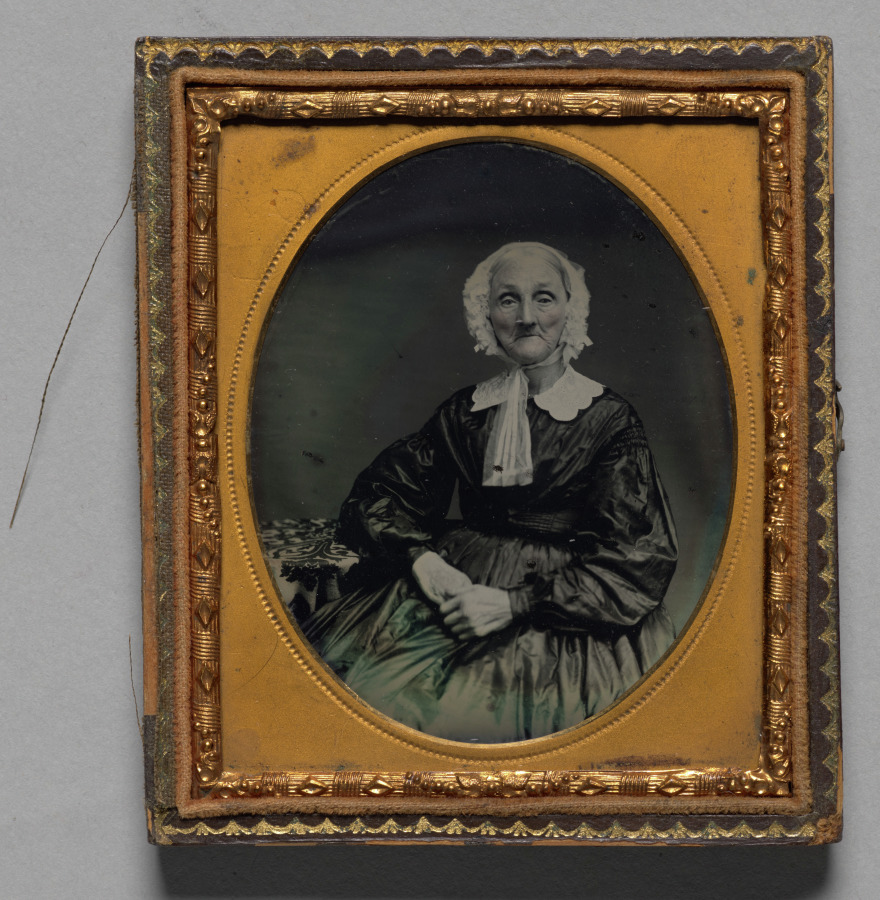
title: Seated old woman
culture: America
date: c. 1864–65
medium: ambrotype, tinted, sixth plate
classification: Photograph